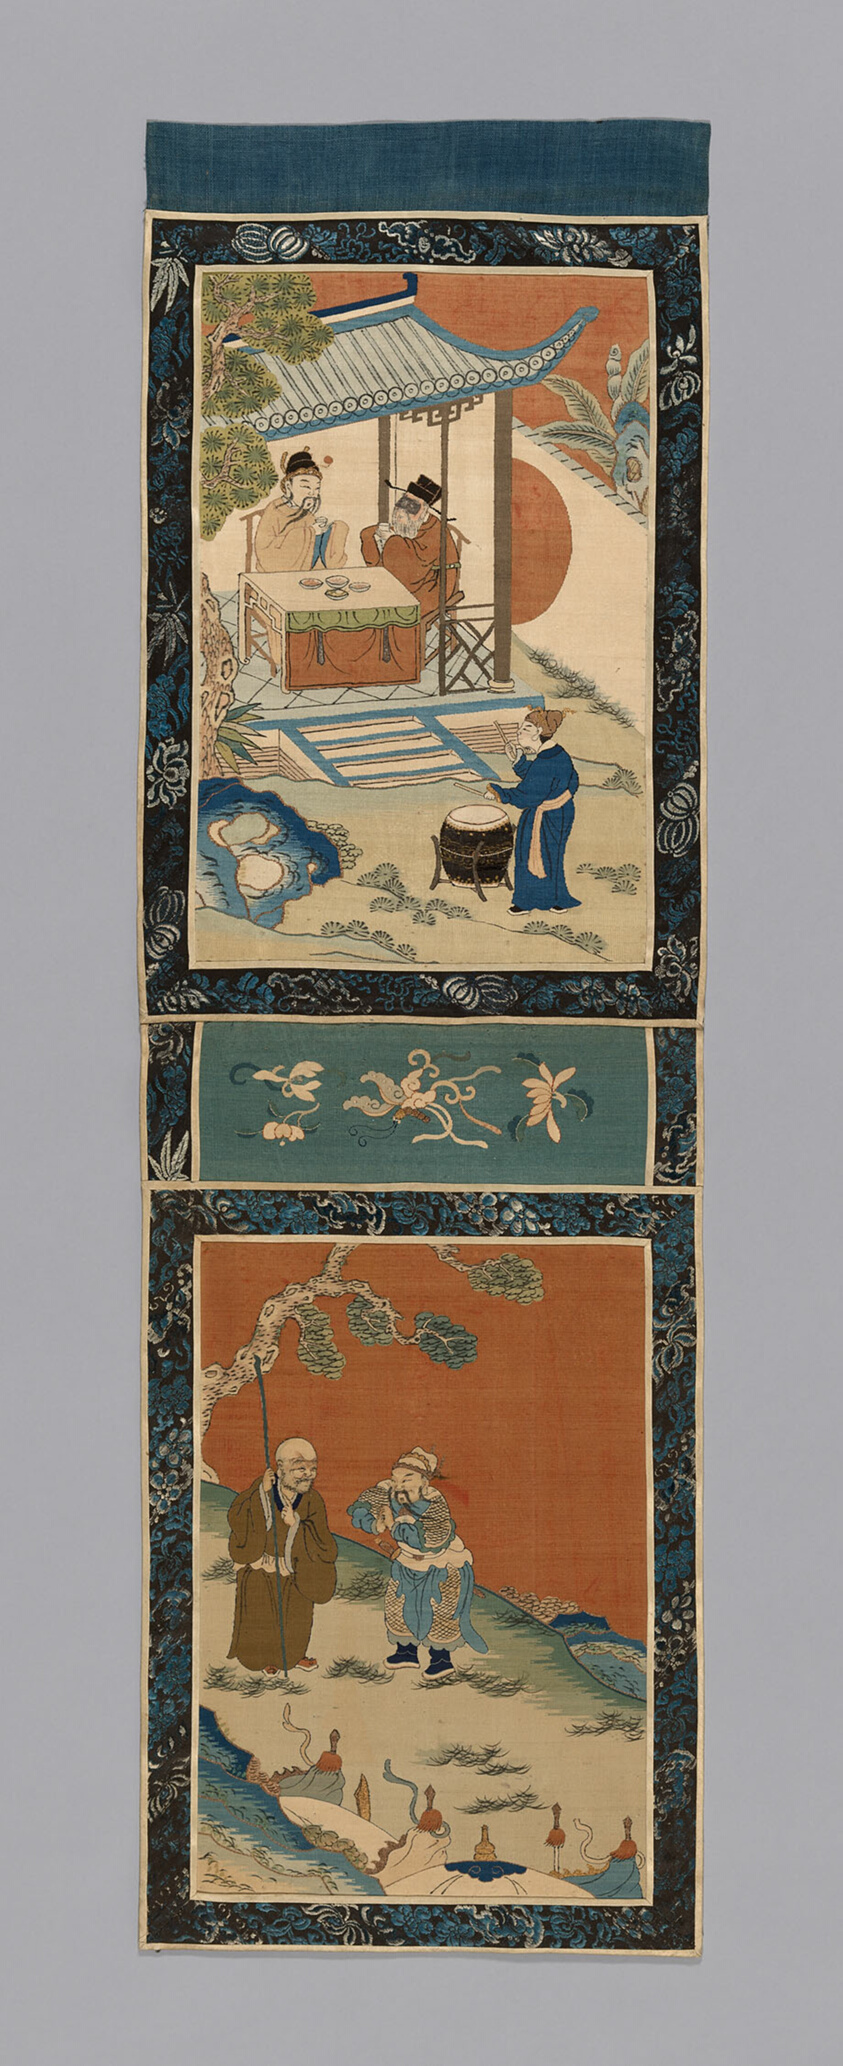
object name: Textile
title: Panel (For a Screen)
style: qing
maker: China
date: Qing dynasty (1644–1911), 1875/1900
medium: Silk and gold-leaf-over-lacquered-paper-strip-wrapped silk, slit tapestry weaves; painted details; border: silk, warp-float faced 7:1 satin weave with supplementary patterning wefts; inner and outer edges: silk, warp-float faced 4:1 satin weave; lined with linen, plain weave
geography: China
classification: textile; weaving